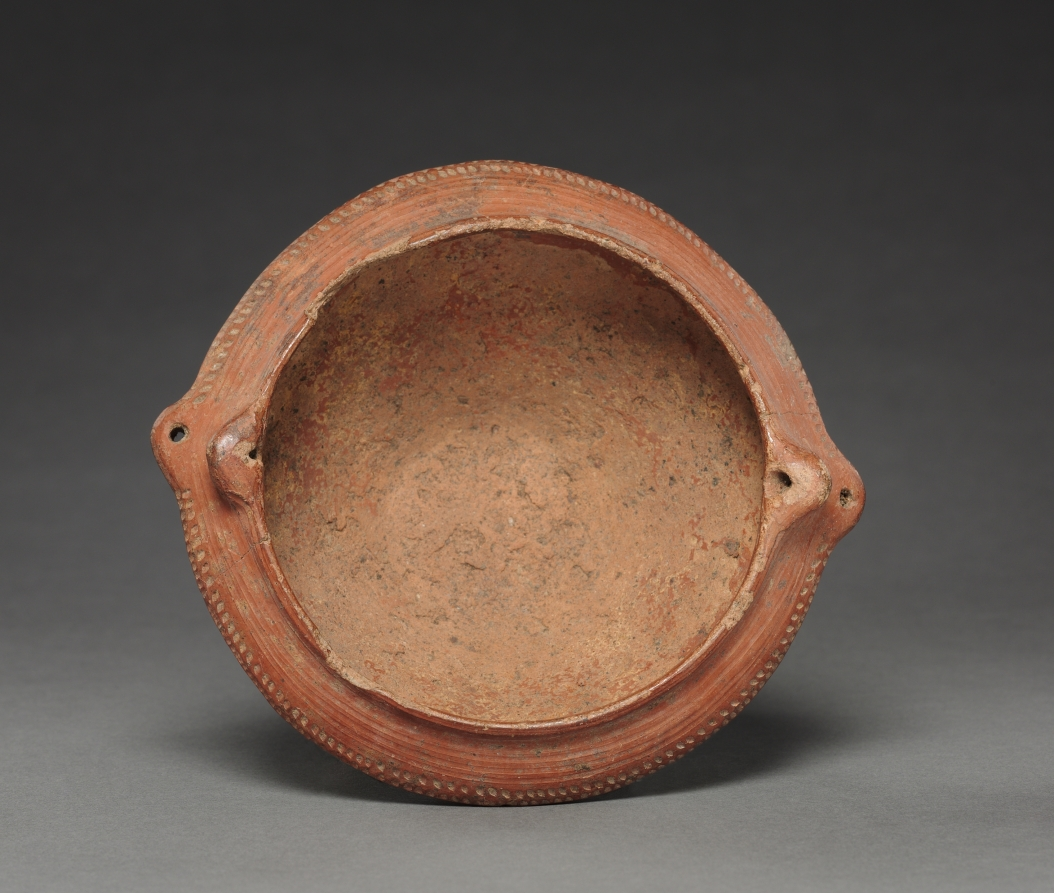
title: Dish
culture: Colombia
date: before 1550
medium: red ware with incised patterns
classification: Ceramic